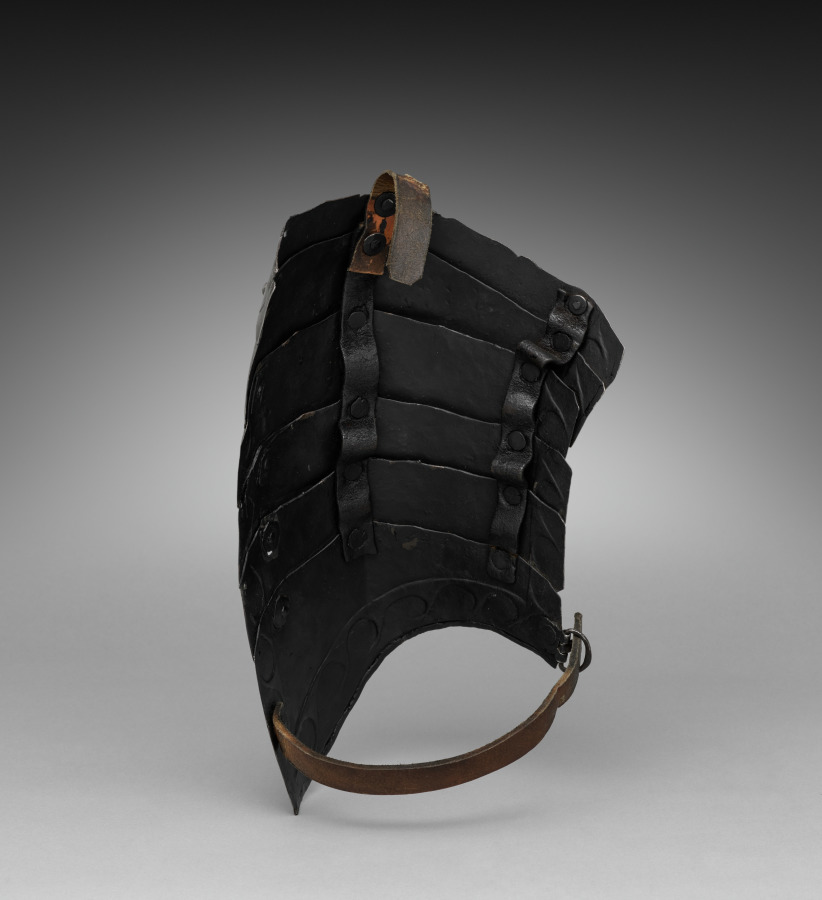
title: Espalier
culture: Germany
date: 1500s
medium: steel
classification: Arms and Armor